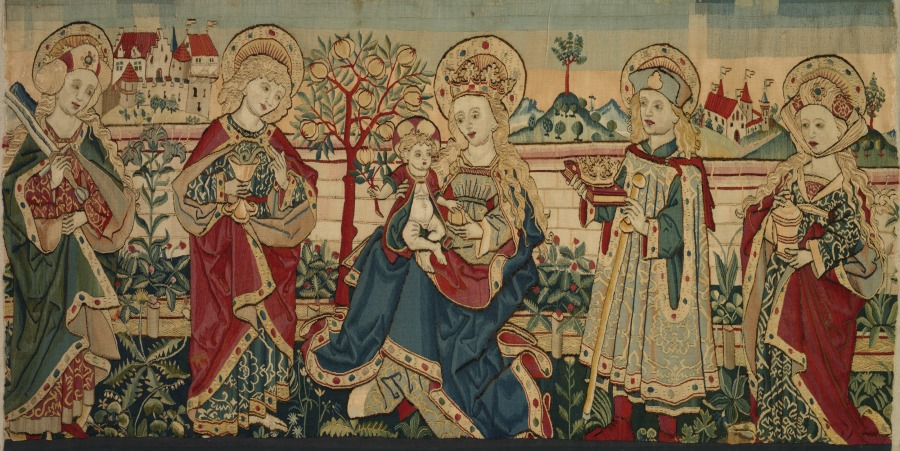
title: Virgin and Child with Four Saints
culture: Germany or Switzerland, Upper Rhine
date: c. 1500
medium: tapestry weave: linen warp, wool and silk wefts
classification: Tapestry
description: Mary and Jesus are seen in front of a wall in a garden that alludes to the Garden of Paradise. They are depicted between four saints: Saint Catherine, John the Evangelist, Jodocus, and Mary Magdalene. The saints wear costumes fashionable around 1475 to 1480. The hanging is said to come from the parish church in St. Lawrence in Nuremberg, Franconia, Bavaria, one of the most important in the commercial city. The appearance of Jodocus may indicate that the textile may have been donated by a wealthy citizen of the same name.